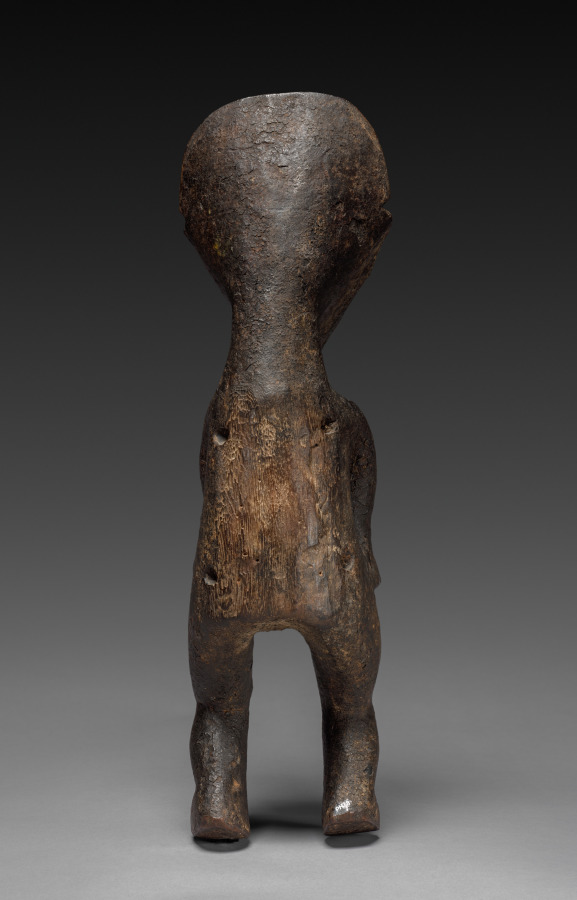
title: Male Figure (Ofika)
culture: Africa, Central Africa, Democratic Republic of Congo, Mbole-style carver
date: late 1800s or early 1900s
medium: Wood, colorant, and upholstery studs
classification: Sculpture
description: Figures such as this, known as ofika, were central to the initiation practices and the enforcement of laws among the all-male Lilwa association, a hierarchical organization that served educational, judicial, political, economic, and ritual functions among the Mbole. Meant to instill a moral code and to act as a cautionary symbol during initiation for Lilwa novices, ofika figures are believed to represent criminals who were ritually hanged for transgressions against Lilwa laws. The figure’s encrusted surface imitates how members covered their bodies with a substance made of ashes and palm oil during burial rites.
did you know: The stripe painted down the figure's torso represents the cord used for execution.